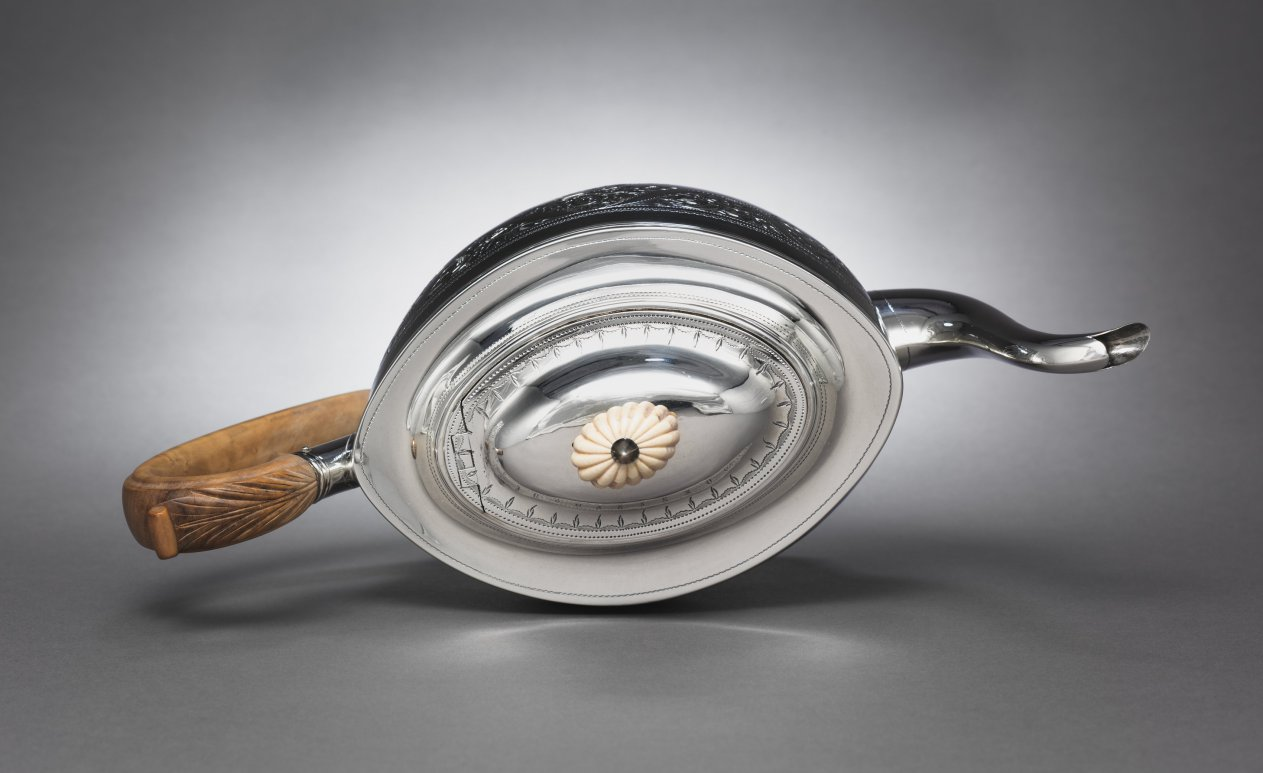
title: Tea Service (Teapot)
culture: London, England, 19th century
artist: Anne Bateman (British, 1748–1813)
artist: Peter Bateman (British, 1740–1825)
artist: William (I) Bateman (British, 1774–1850)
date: 1801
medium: silver, ivory, wood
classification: Silver